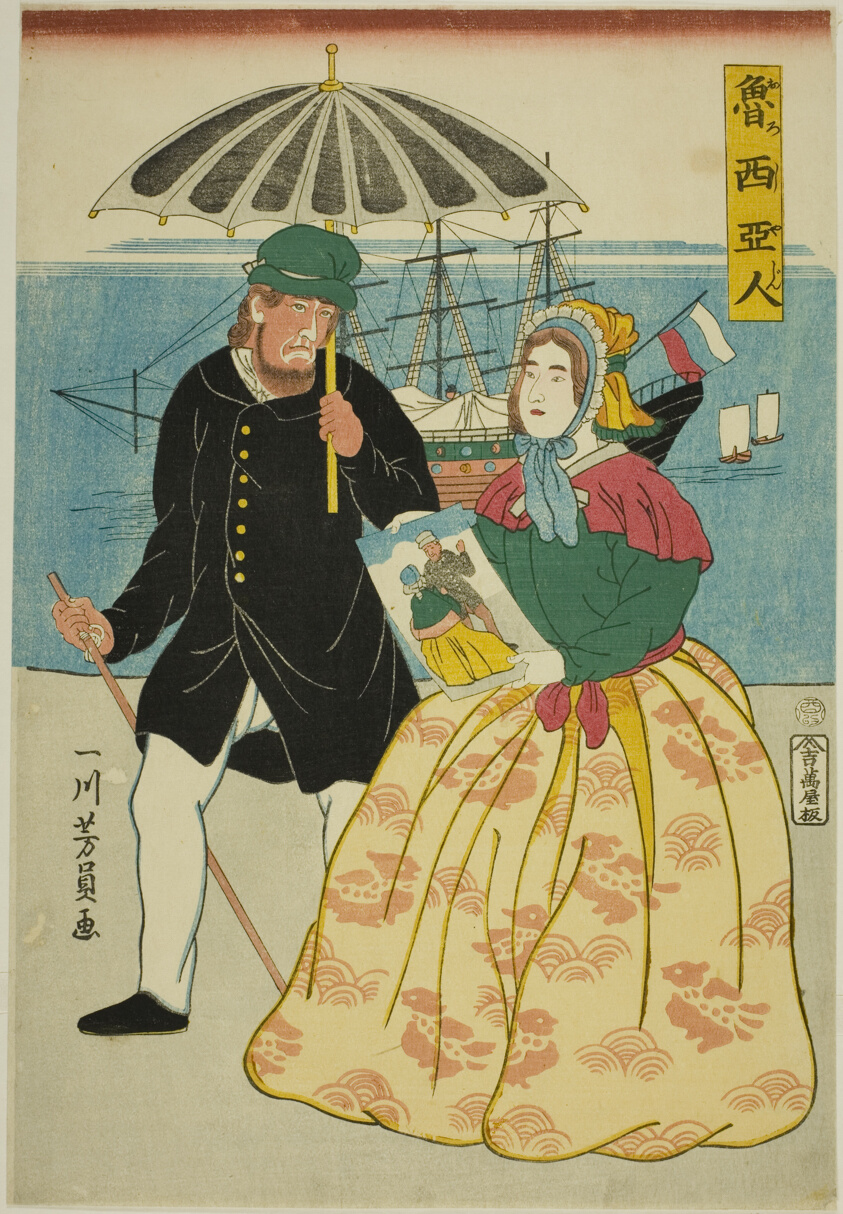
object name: Print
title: Russians (Oroshiajin)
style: Japanese (culture or style)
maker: Utagawa Yoshikazu (Japanese, active c. 1850-70)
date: 1861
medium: Color woodblock print; oban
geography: Japan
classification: woodblock print; print; asian art